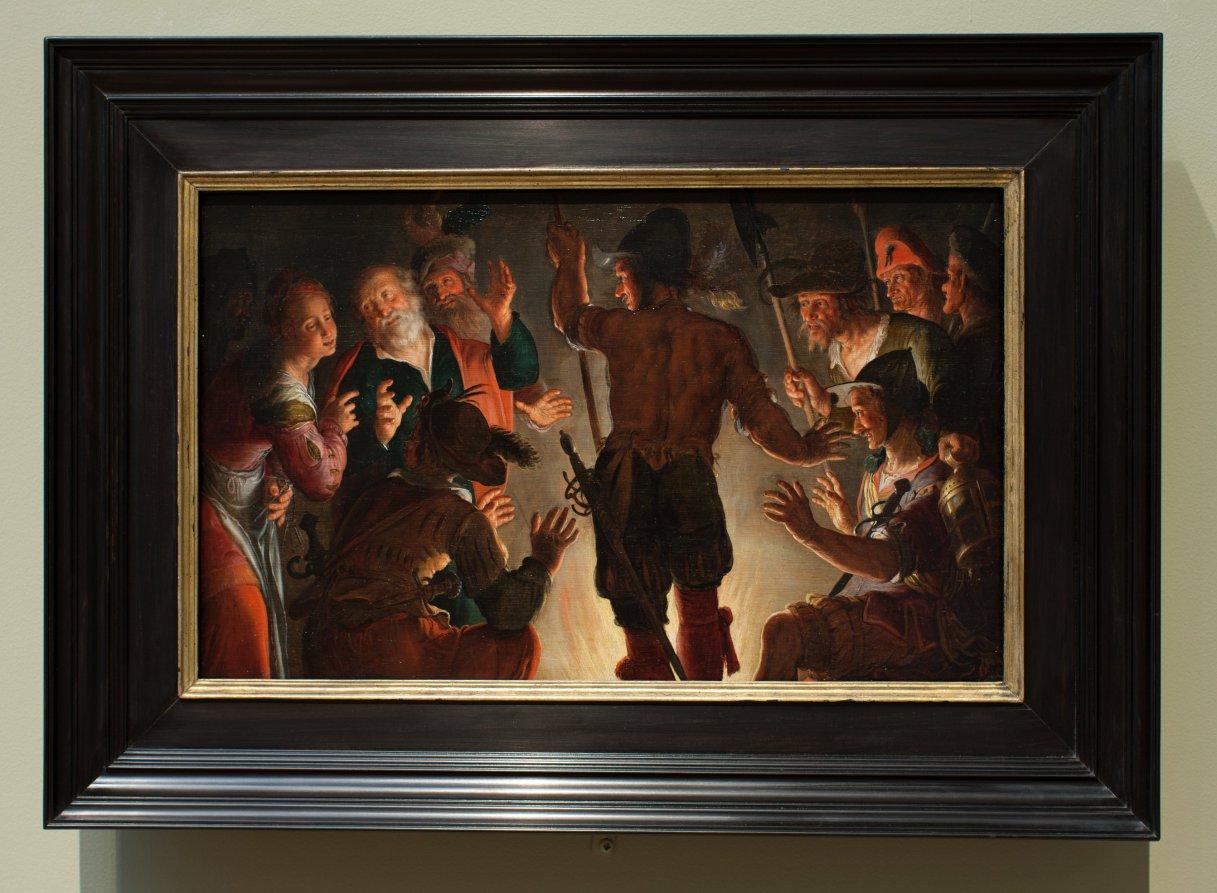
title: The Denial of Peter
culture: Netherlands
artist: Peter Wtewael (Dutch, 1596–1660)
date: c. 1624–28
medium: oil on wood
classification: Painting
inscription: Signed upper right: "Pet[...] / W[...]"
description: Wtewael depicted the moment after the Last Supper when the apostle Peter (at the left) denied knowing Jesus in order to protect himself from Roman soldiers searching for Christ's followers. Few works by this artist are known, and he draws on an unusual combination of styles. The dramatic use of light derives from Dutch followers of the Italian painter Caravaggio, in vogue around 1625, while the twisting bodies, startlingly low viewpoint, and tight detailing come from a more refined, courtly mode more popular earlier in the century.